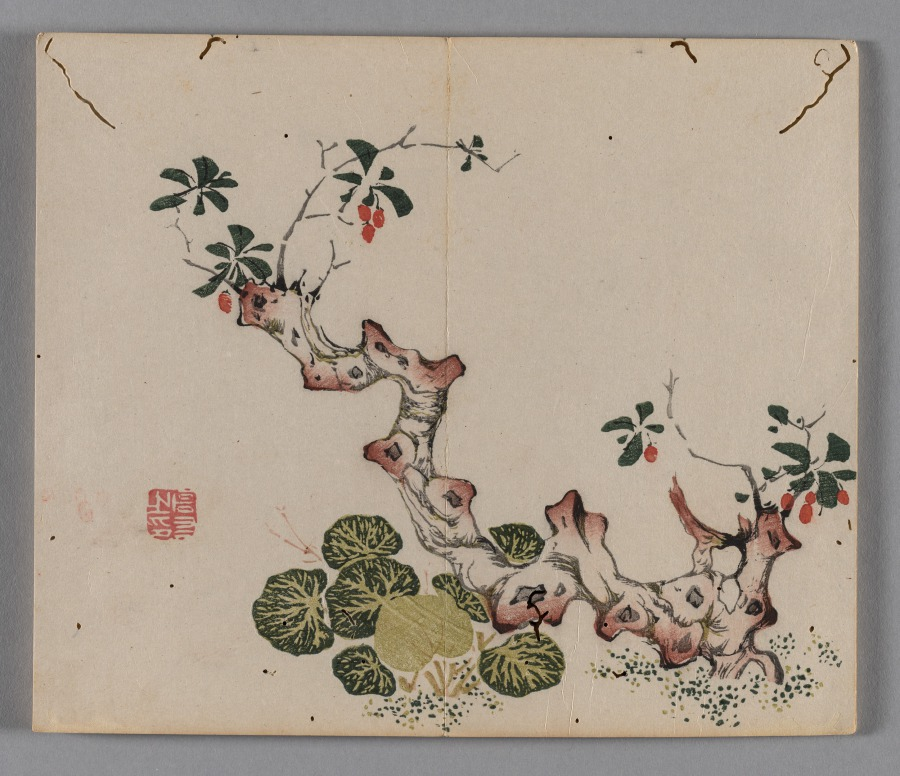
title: Ten Bamboo Studio Collection of Calligraphy and Painting: Miscellaneous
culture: China, Qing dynasty (1644-1911)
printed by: Hu Zhengyan (Chinese, c. 1584–1674)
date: 1633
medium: Woodblock-printed book; ink and colors on paper; first edition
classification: Print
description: Color printing reached a level of perfection in the early 1600s, as seen in this Ten Bamboo Studio Collection of Calligraphy and Painting and the Mustard Seed Garden Manual of Painting (printed 1679 and 1701). The painterly quality, precision in registering (aligning) the woodblocks, and harmonious colors made them the most successful color print editions in Chinese history. Both editions were printed and compiled in Nanjing, spread nationwide, and had a great impact on the arts in Japan and Korea.